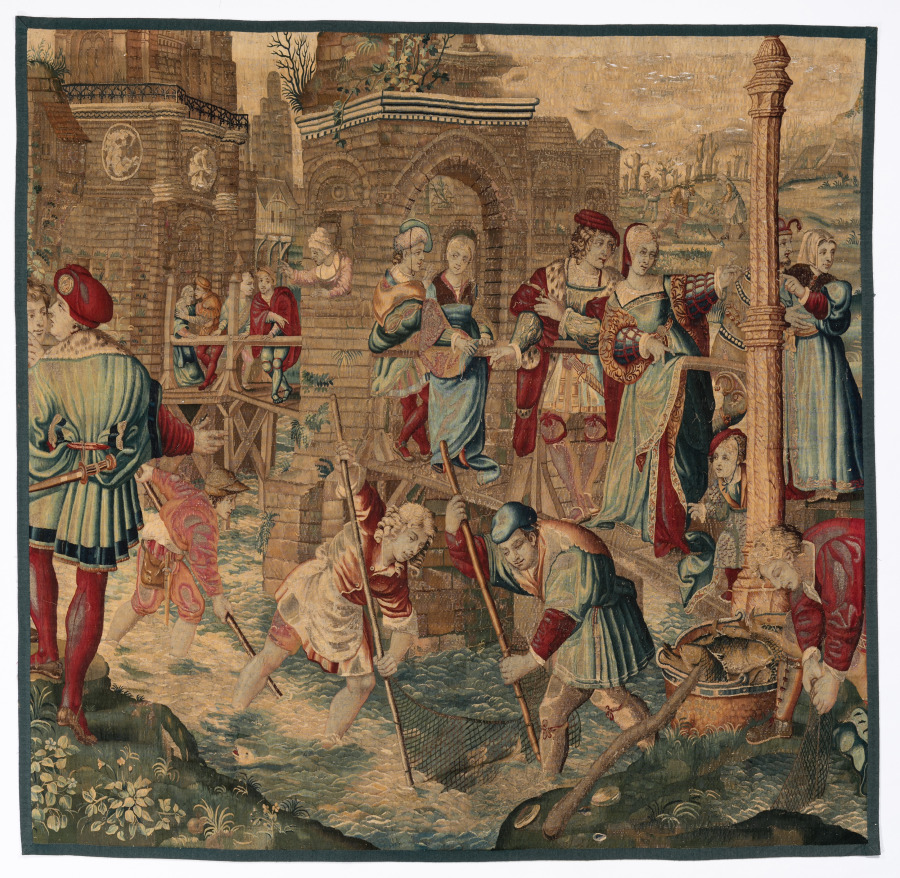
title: Four Seasons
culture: France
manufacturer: possibly by Gobelins Manufactory (France, Paris, est. 1662)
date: designed c. 1535, woven mid- to late 1600s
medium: Wool, silk, and gold filé; tapestry weave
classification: Tapestry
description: Each of these tapestries depict rustic activities appropriate to the season: fishing and gardening for spring, harvesting of grain in summer, wine making for autumn, and ice skating for winter. As tapestries fell out of vogue in the 1700s and 1800s many were burned so their metal threads could be harvested to mint new coins. Before coming to the Cleveland Museum of Art, these tapestries hung in the family home of Frank H. Ginn and Cornelia Root Ginn in Gates Mills, Ohio. Their children donated the tapestries to the museum in 1952.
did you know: At the time of the Four Seasons's production, weavers at the Gobelins Manufactory in Paris were paid on a wage-scale based on the difficulty of the weaving; those who wove heads and flesh tones were paid the most.